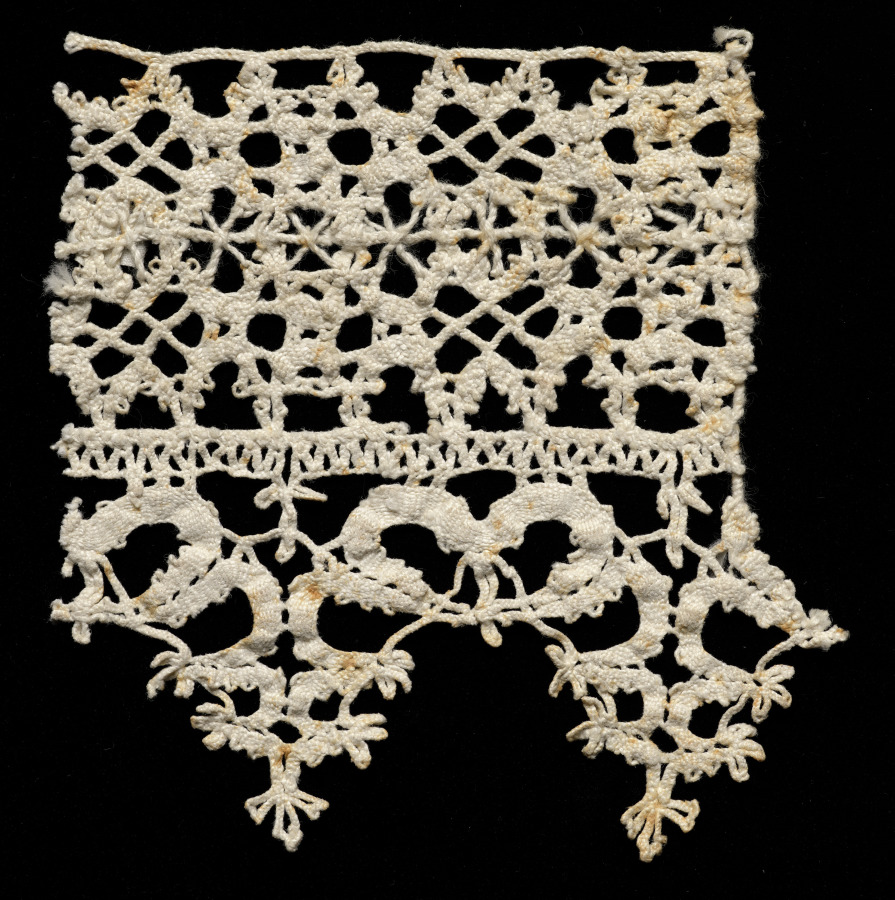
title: Lace Insertion with Edging of Points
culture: Italy, Venice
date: 1600–1640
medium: Bobbin lace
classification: Lace